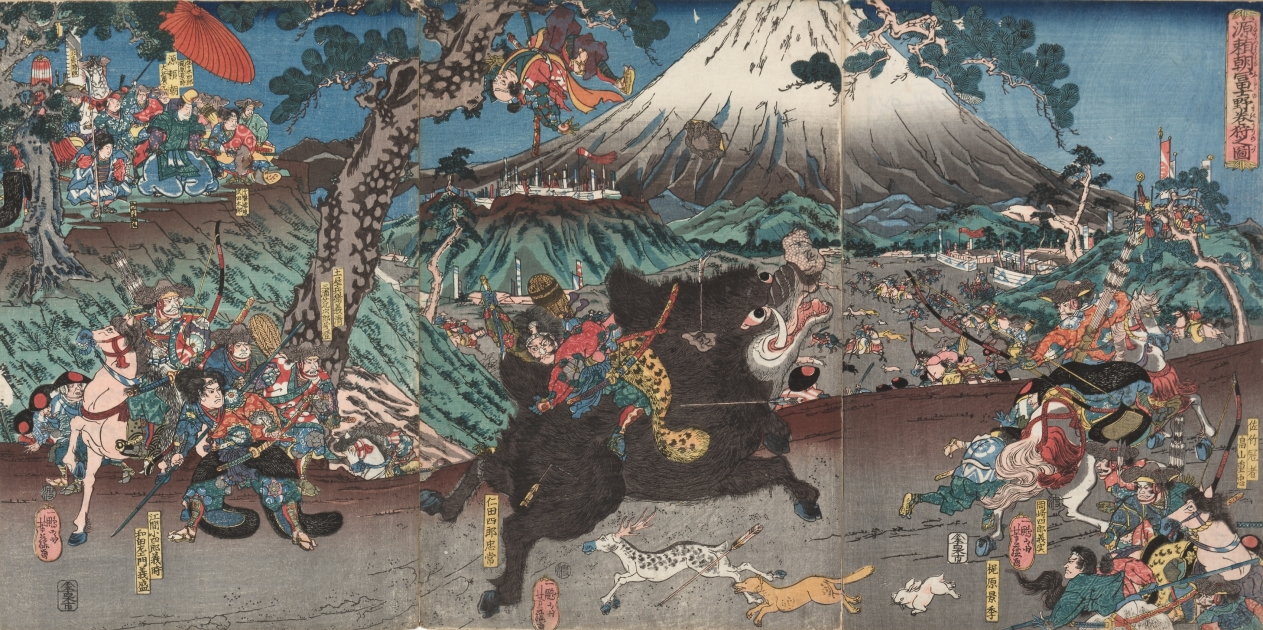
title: Picture of Minamoto no Yoritomo's Hunt on the Slopes of Mount Fuji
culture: Japan, Edo period (1615–1868)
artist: Utagawa Yoshifuji (Japanese, 1828–1887)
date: mid 1840s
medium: color woodblock print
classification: Print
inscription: Signature: Ipposai Yoshifuji ga Publisher: Izumiya Ichibei (Senichi han) Censorship Seal: Wata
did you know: The print designer’s name is in a red form on each of the three prints forming this composition, while the names of important figures pictured are in yellow rectangles.